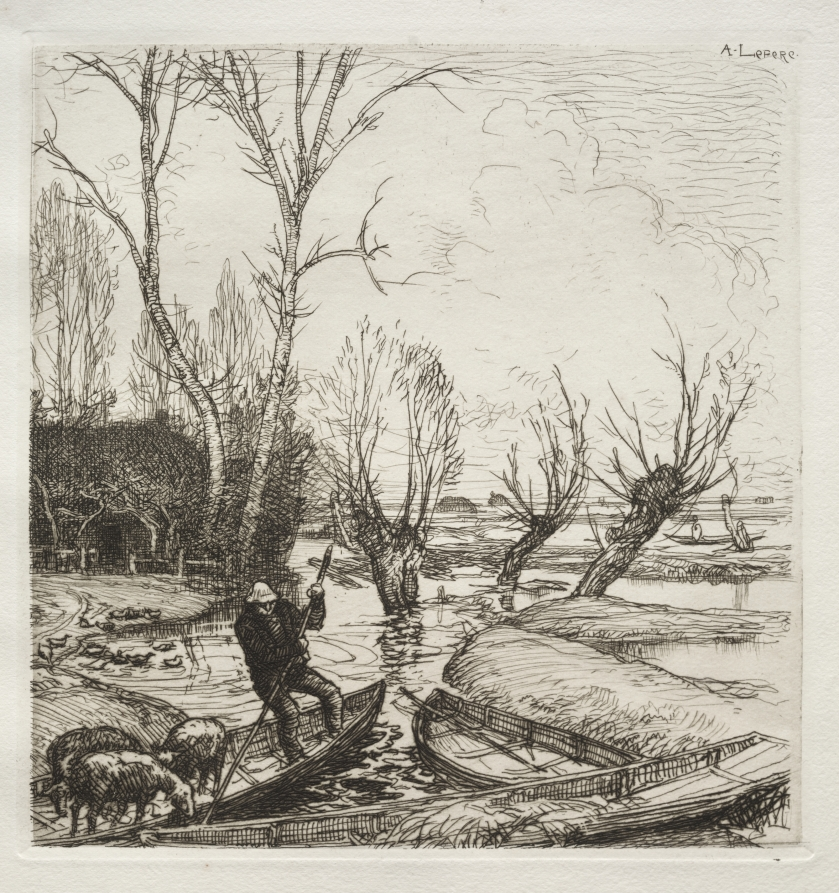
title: Au Marais Inondé: Le Bergère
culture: France, 19th-20th century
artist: Auguste Louis Lepère (French, 1849–1918)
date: c. 1870–1918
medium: etching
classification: Print